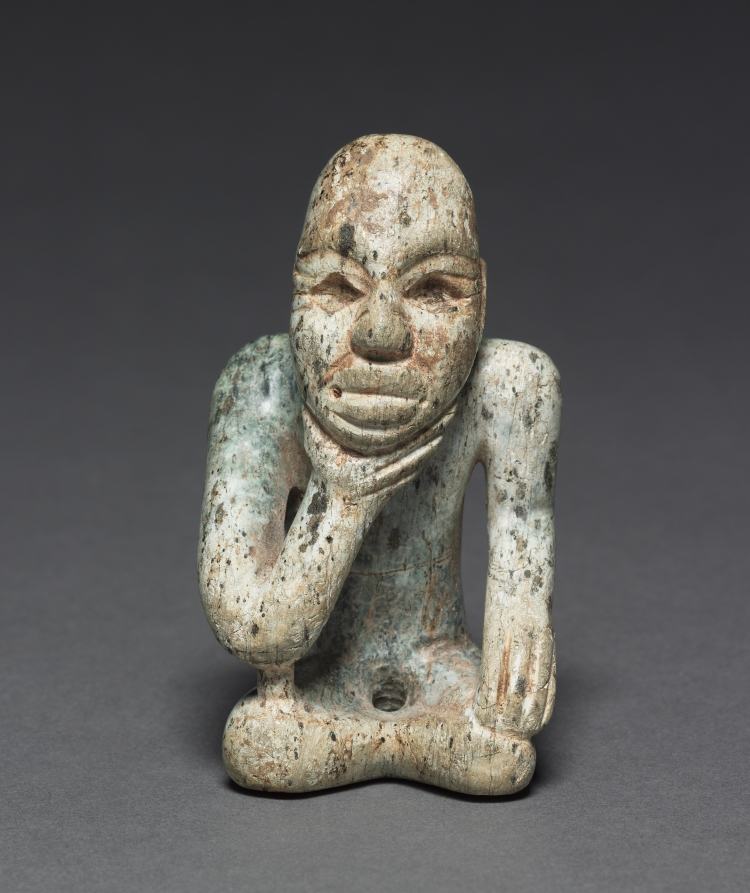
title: Seated Figure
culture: Mesoamerica, Mexico, Olmec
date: 1200–300 BCE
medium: jade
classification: Jade